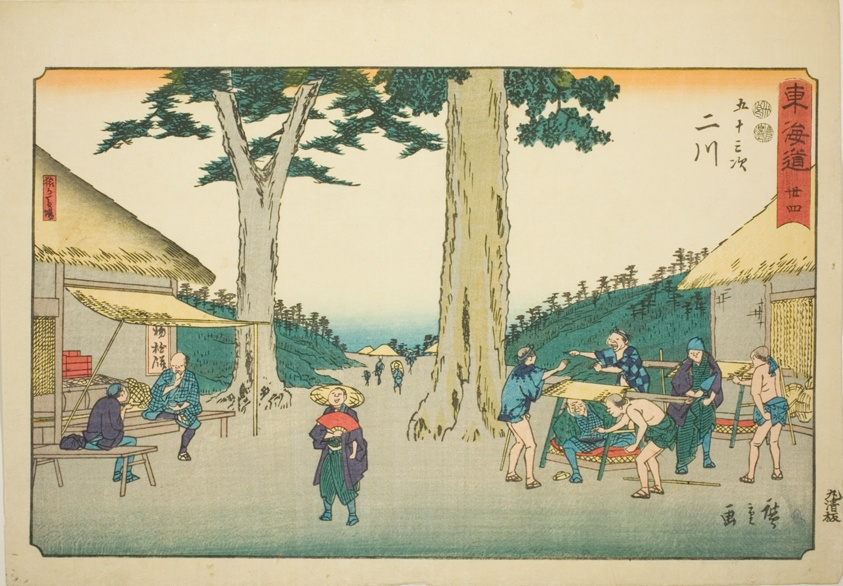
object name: Print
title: Futakawa: Sarugababa—No. 34, from the series "Fifty-three Stations of the Tokaido (Tokaido gojusan tsugi)," also known as the Reisho Tokaido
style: Japanese (culture or style)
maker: Utagawa Hiroshige 歌川 広重; Japanese, 1797-1858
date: c. 1847/52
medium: Color woodblock print; oban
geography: Japan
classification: woodblock print; print; asian art